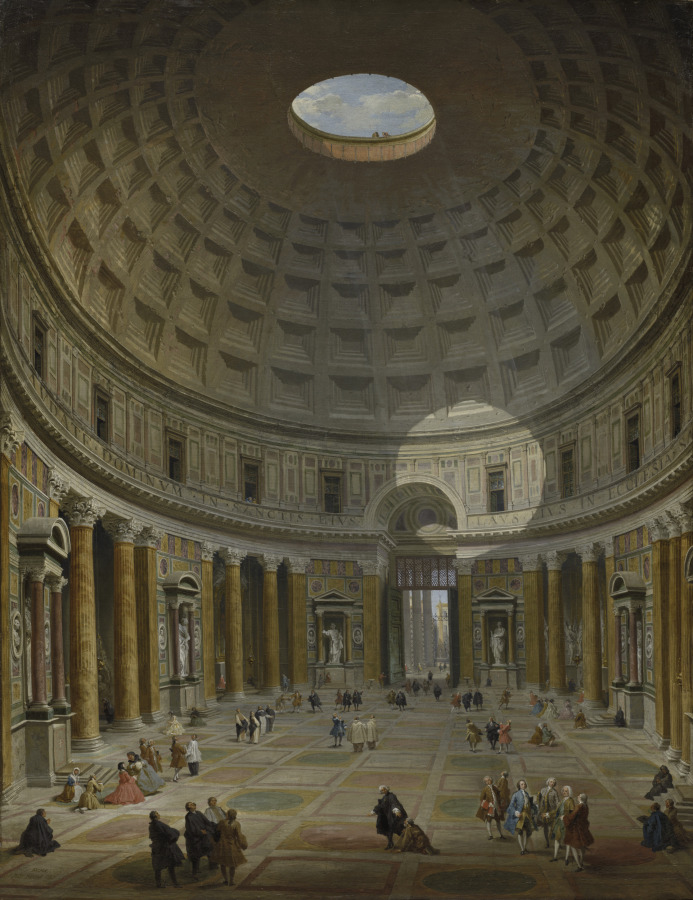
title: Interior of the Pantheon, Rome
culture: Italy, 18th century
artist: Giovanni Paolo Panini (Italian, 1691–1765)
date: 1747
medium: oil on canvas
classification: Painting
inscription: Signed lower left: "ROMAE / [I] P. PANINI. 1747."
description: Created as a temple under the Roman emperor Hadrian around the year AD 125, the Pantheon became a Christian church in 609. Significant restoration took place in the early 1700s, a period of renewed attention to early Christian monuments. The site was a major monument of antiquity, an active church, and its portico, visible through the door, held the most important art fair in the city. Panini shows the complexity of this public space by representing foreign tourists, local churchgoers, Roman nobles, and artists mingling under the dome.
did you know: Panini's depictions of contemporary and ancient Rome were popular with foreigners who visited the city on their Grand Tours.